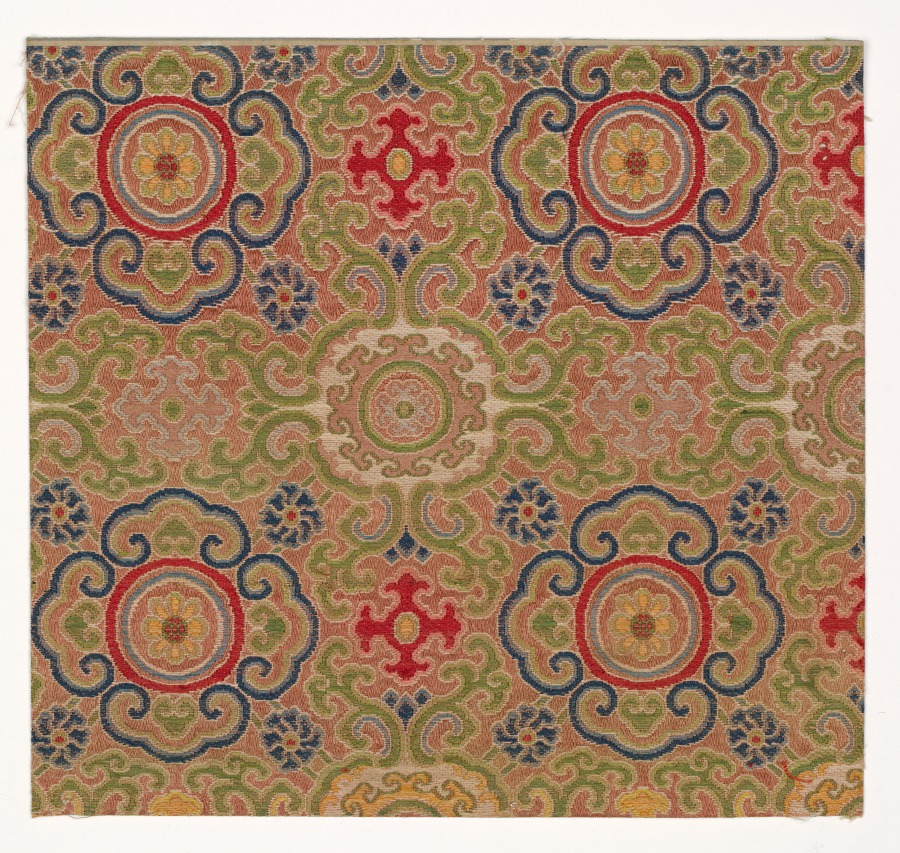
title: Fragment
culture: China, 19th century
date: 1800s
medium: silk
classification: Textile